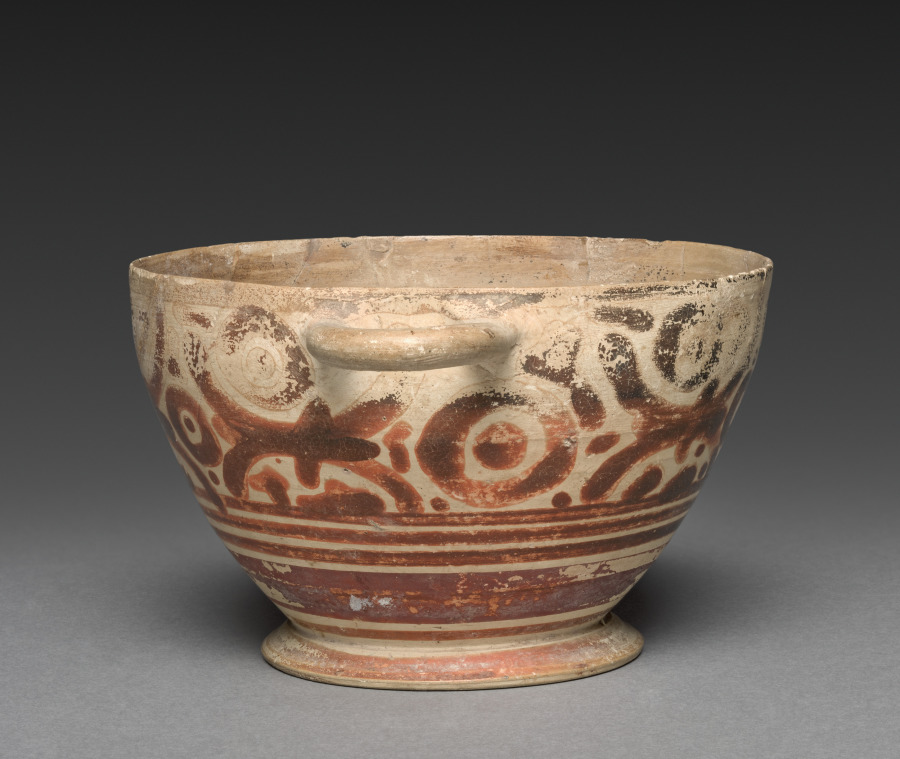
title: Black-Figure Kotyle (Drinking Cup)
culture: Greek, Corinthian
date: 500s BCE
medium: ceramic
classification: Ceramic